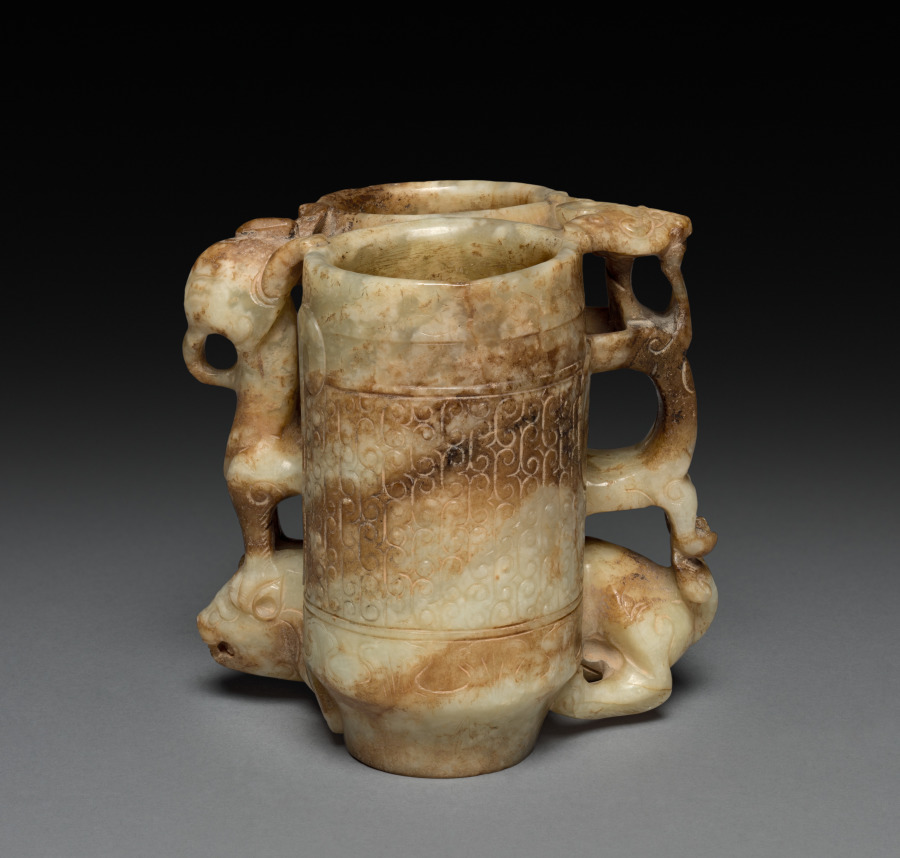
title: Champion Vase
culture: China, Song dynasty (960-1279) - Ming dynasty (1368-1644)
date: 960– 1279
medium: jade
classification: Jade